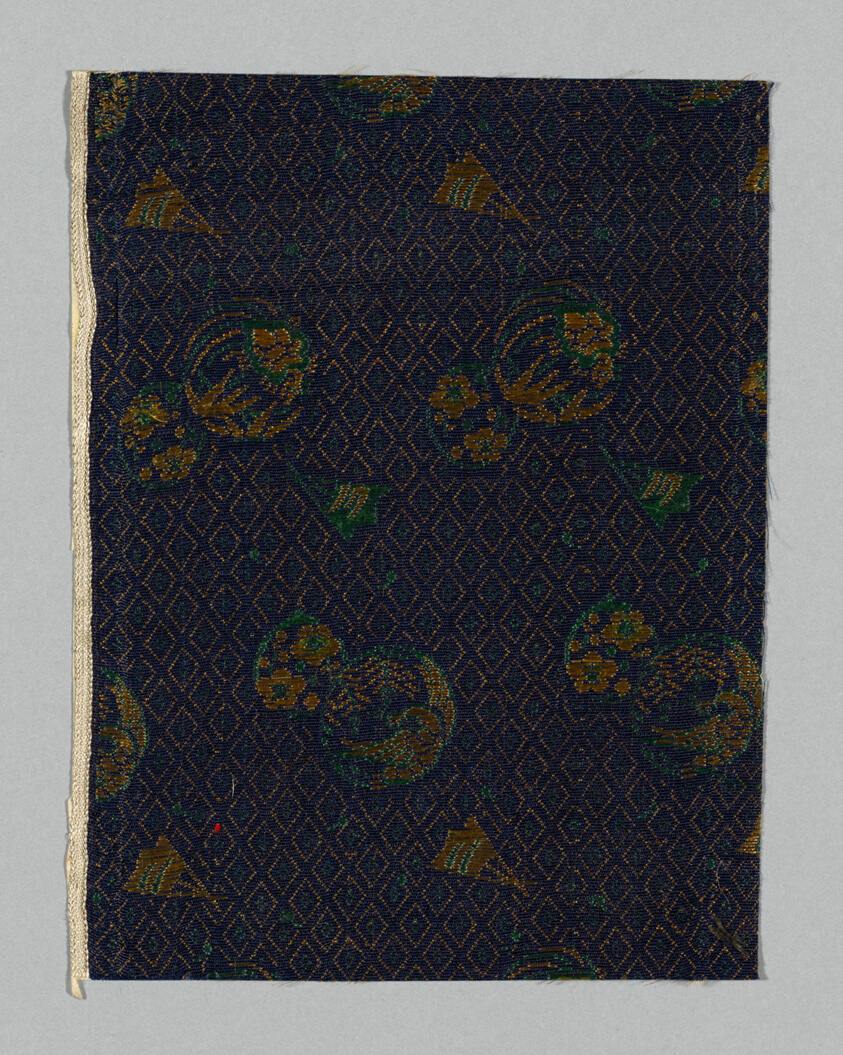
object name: Textile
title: Fragment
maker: Japan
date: Edo period (1615–1868), 1775/1800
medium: Silk, plain wave with supplementary patterning wefts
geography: Japan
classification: textile; weaving